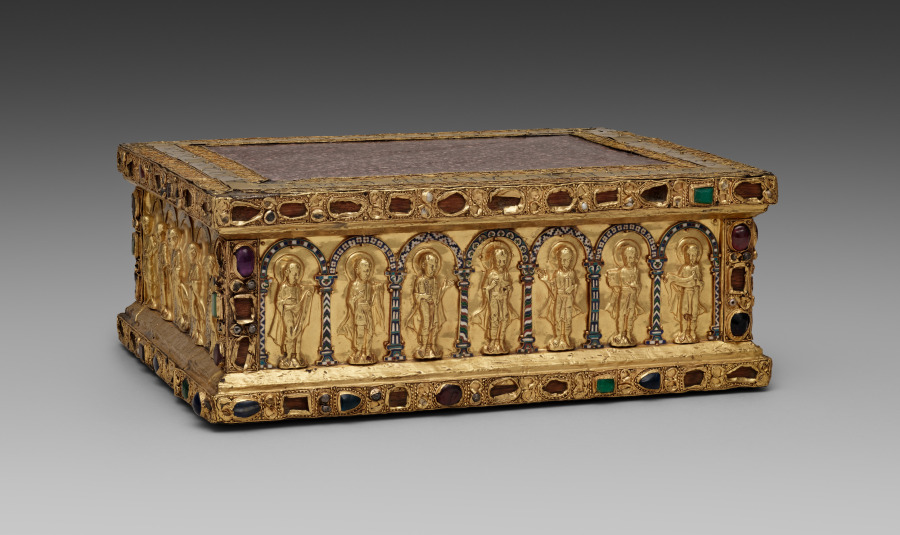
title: Portable Altar of Countess Gertrude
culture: Germany, Lower Saxony?, Romanesque period, 11th century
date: c. 1045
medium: gold, cloisonné enamel, porphyry, gems, pearls, niello, wood core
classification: Metalwork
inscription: GERDRVDIS XPO FELIX VT | VIVAT IN IPSO OBTVLIT HVNC LAPIDEM GEMMIS | AVROQ NITENTEM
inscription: SIGISMVNDVS, CONSTANTIVS, SANCTA CRVX, SCA ELENA, SCA ADALHEIT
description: Commissioned by Countess Gertrude of Brunswick, this portable altar is one of the Guelph Treasure’s earliest and most sumptuous objects. The choice of white-speckled porphyry as the altar stone signals Gertrude’s worldly aspirations; an imperial color since classical antiquity, porphyry was only used by the imperial family. Historical figures of royal and imperial rank are depicted with Christ, the Virgin, apostles, and archangels along the altar’s sides, stressing the countess’s political ambitions and claim of imperial lineage for her own dynasty. The Latin inscription surrounding the altar stone reads, "Gertrude offers to Christ, to live joyfully in him, this stone that glistens with gems and gold."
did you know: On the bottom of this altar is a trap door that opened to reveal small relics of saints wrapped in silk.